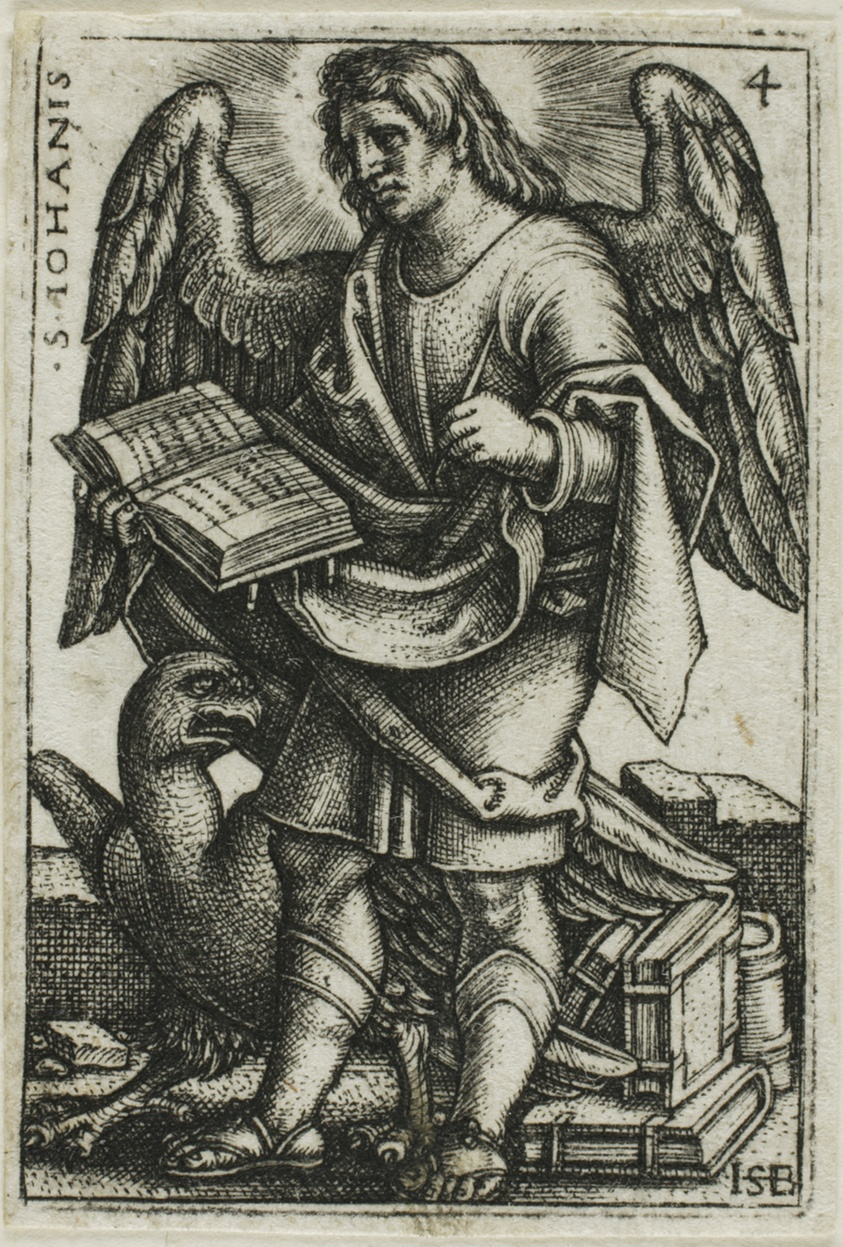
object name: Print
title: St. John, from The Four Evangelists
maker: Sebald Beham; German, 1500-1550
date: 1541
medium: Engraving in black on ivory laid paper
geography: Germany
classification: engraving; print; prints and drawing